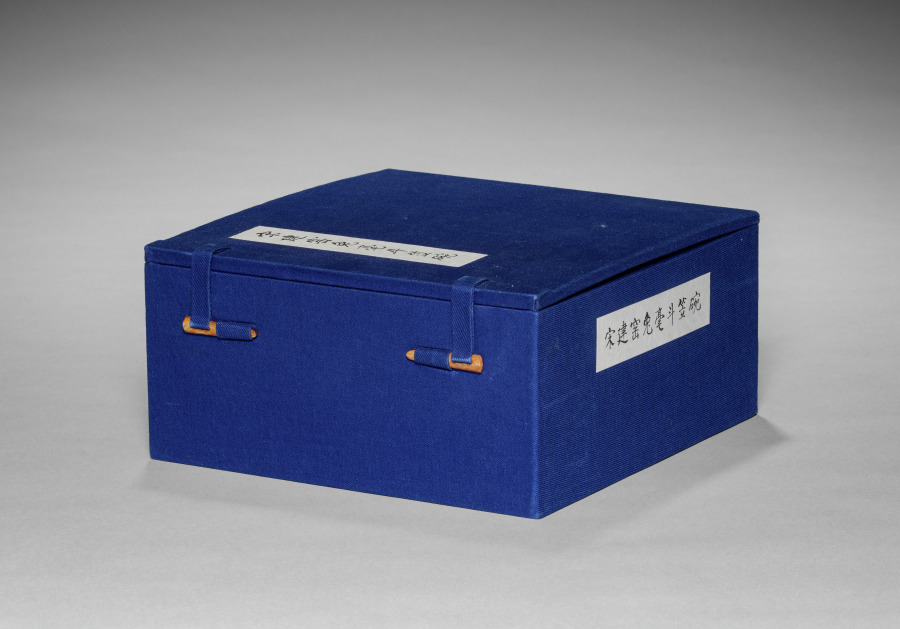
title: Black Glazed Teabowl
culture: China, Fujian province, Southern Song dynasty (1127-1279)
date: 1100s–1200s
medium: Stoneware with opaque dark brown glaze, Jian ware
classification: Ceramic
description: This teabowl exhibits a shiny almost mirror-black, thick glaze that runs down from the mouth showing fine, bluish-brown streaks around the rim. The Northern Song dynasty emperor Huizong (徽宗, reigned 1100–1126) once referred to the markings as “hare’s fur.” The emperor also remarked that Jian bowls should be deep and wide to allow tea powder to be whisked sufficiently in the bowl. The contrast between the tea’s white foam and the dark glaze was appreciated by connoisseurs. The thick walls and conical shape of the bowls were ideal for keeping tea hot and frothy.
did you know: Jian ware was made in Fujian province, first in kilns at Jian’an and later at Jianyang.